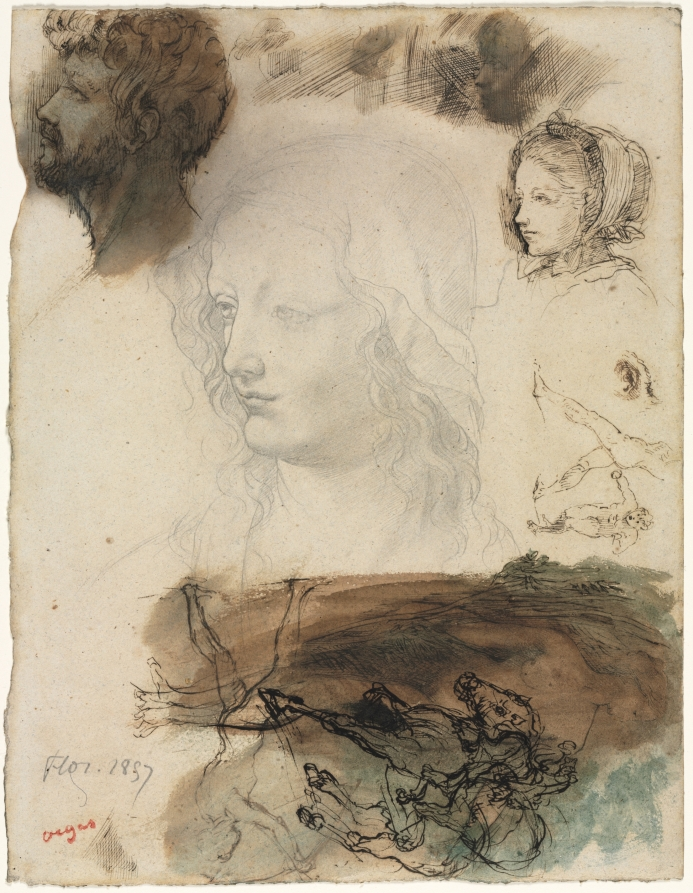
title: Sheet of Studies and Sketches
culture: France, 19th century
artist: Edgar Degas (French, 1834–1917)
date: 1858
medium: graphite, pen and dark brown ink, and watercolor on thick ivory wove paper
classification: Drawing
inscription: Inscribed, lower left, in graphite: Flor. 1857; stamped, lower left, in red ink: artist’s stamp [Lugt 658]; verso, in red ink: estate stamp [Lugt 657]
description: Degas traveled to Florence, Italy, in July 1858, where he made this sheet of studies. The featured imagery is fragmented and dissociated, suggesting the young artist's engagement with art of the past. The refined female head drawn at center in graphite was copied from a drawing then attributed to Leonardo da Vinci in the Uffizi Gallery's collection. Other sketches record Degas's responses to Florentine sculpture. At upper right, he sketched an informal portrait of his cousin Giulia Bellelli, probably from life.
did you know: The date Degas wrote on this drawing is incorrect; he didn't visit Florence until 1858, and must have inscribed the sheet years later.